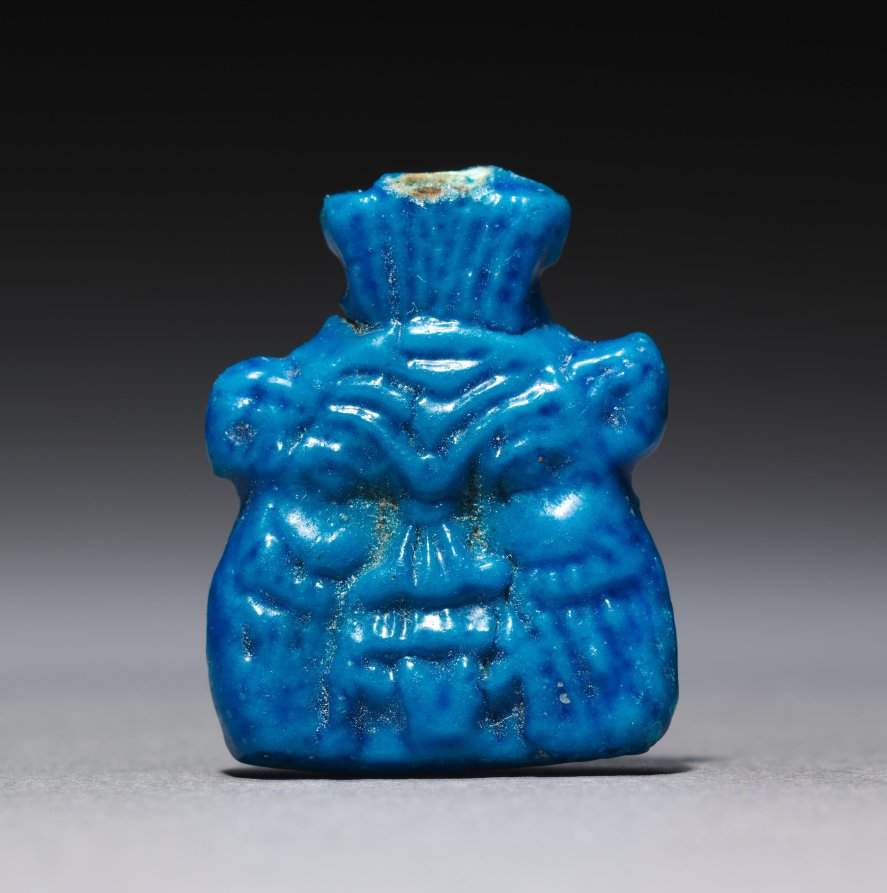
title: Bes Head Amulet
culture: Egypt, Third Intermediate (1069–715 BCE) or later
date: 1069–715 BCE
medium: turquoise blue faience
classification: Amulets